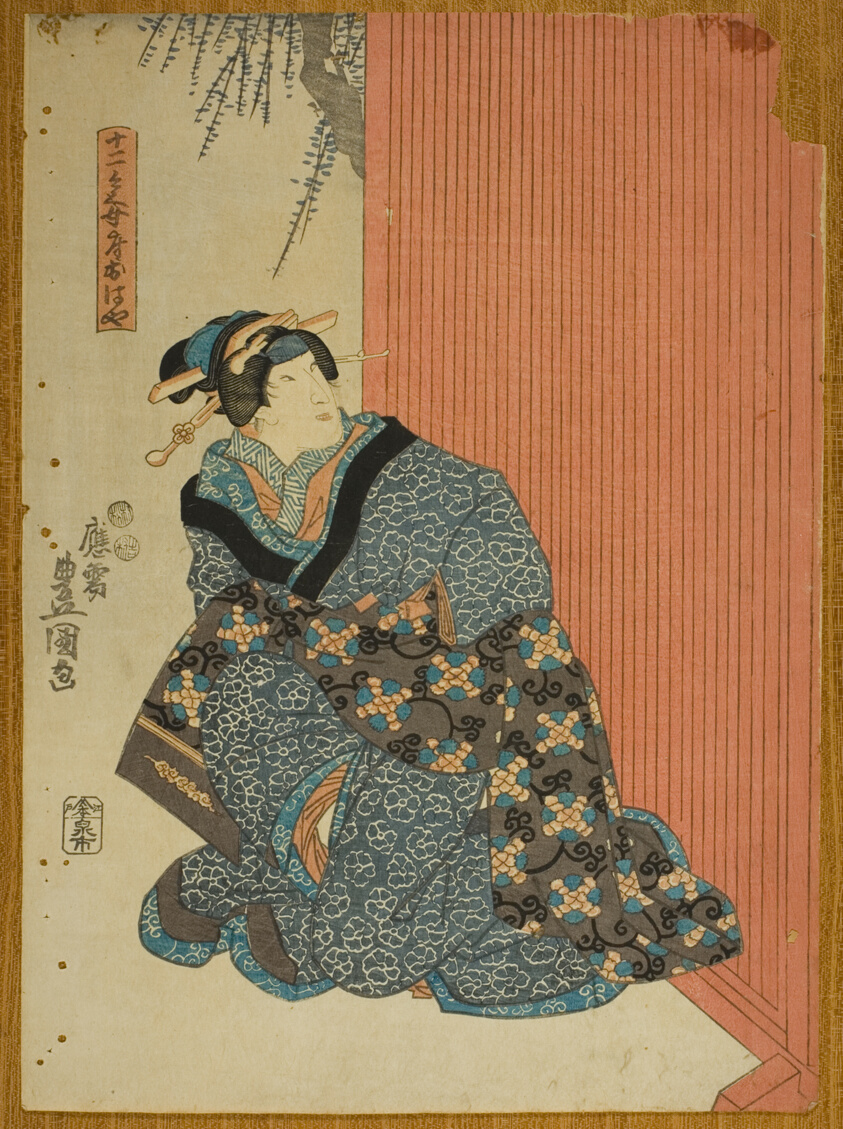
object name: Print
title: Actor Bando Shuka I as Jujibei's Wife Ohaya (Jujibei nyobo Ohaya)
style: Japanese (culture or style), edo (japanese period), Japanism, East Asian, asian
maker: Utagawa Kunisada I (Toyokuni III) (Japanese, 1786-1864)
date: c. 1848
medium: Color woodblock print; oban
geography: Japan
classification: woodblock print; print; asian art